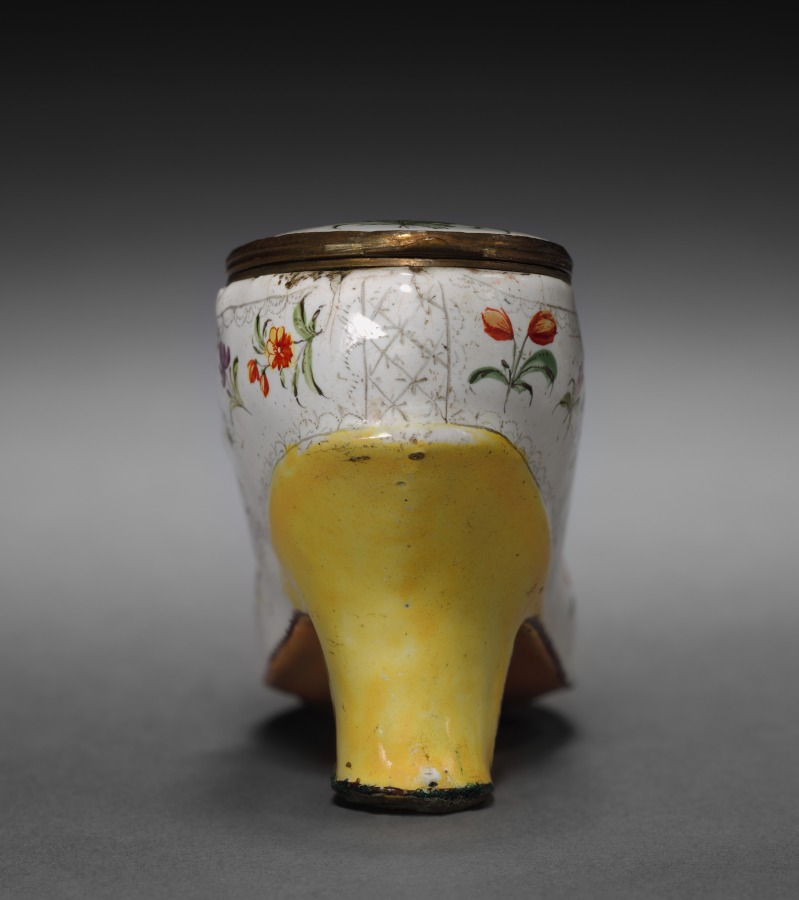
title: Box in Form of Shoe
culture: England or France, mid-18th Century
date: mid-18th century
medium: enamel on copper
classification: Enamel